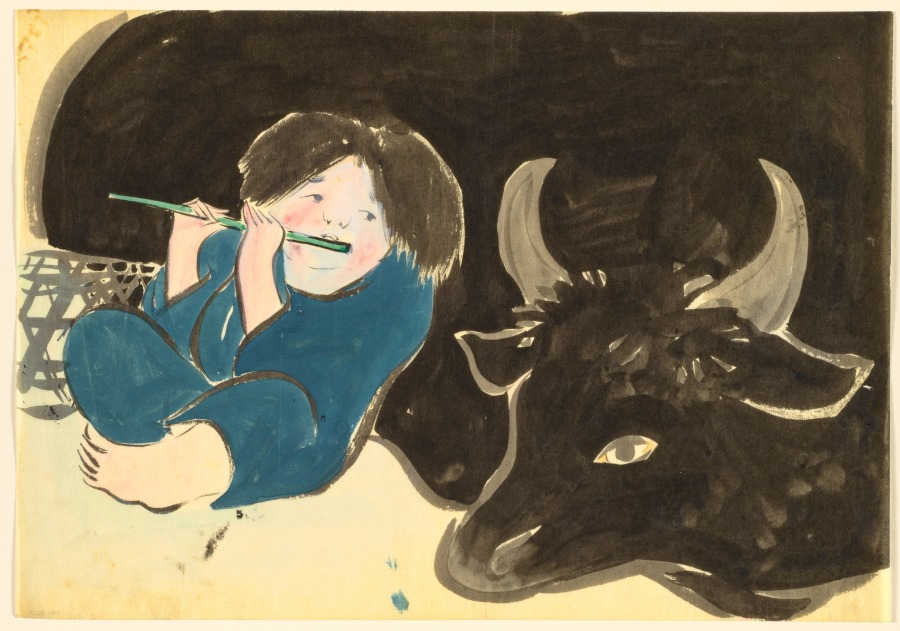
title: Flowers of a Hundred Worlds (Momoyogusa): Oxherd (Bokudo)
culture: Japan, Meiji period (1868–1912)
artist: Kamisaka Sekka (Japanese, 1866–1942)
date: 1909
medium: ink and color on paper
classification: Drawing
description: Kamisaka Sekka made preparatory drawings for his Flowers of a Hundred Worlds series on tracing paper with ink and color. The freehand sketches are much looser than the finished, printed compositions.